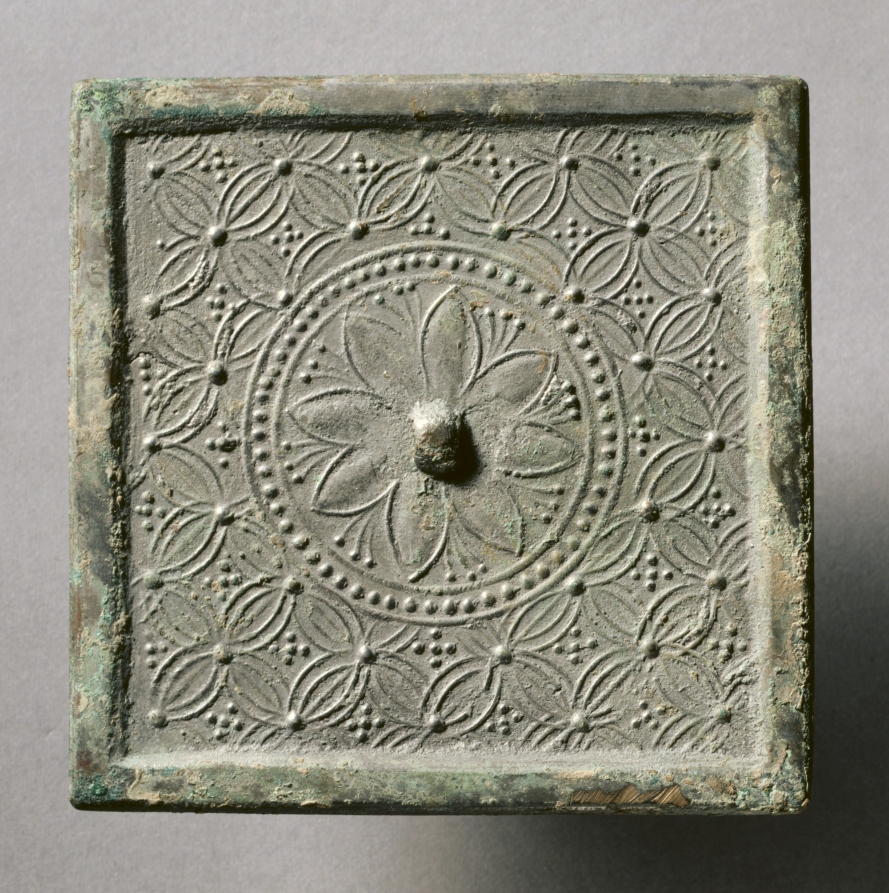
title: Square Mirror with Floral and Coin Motifs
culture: China, Liao dynasty (916-1125) - Song dynasty (960-1279)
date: early 900s-early 1100s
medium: bronze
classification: Metalwork